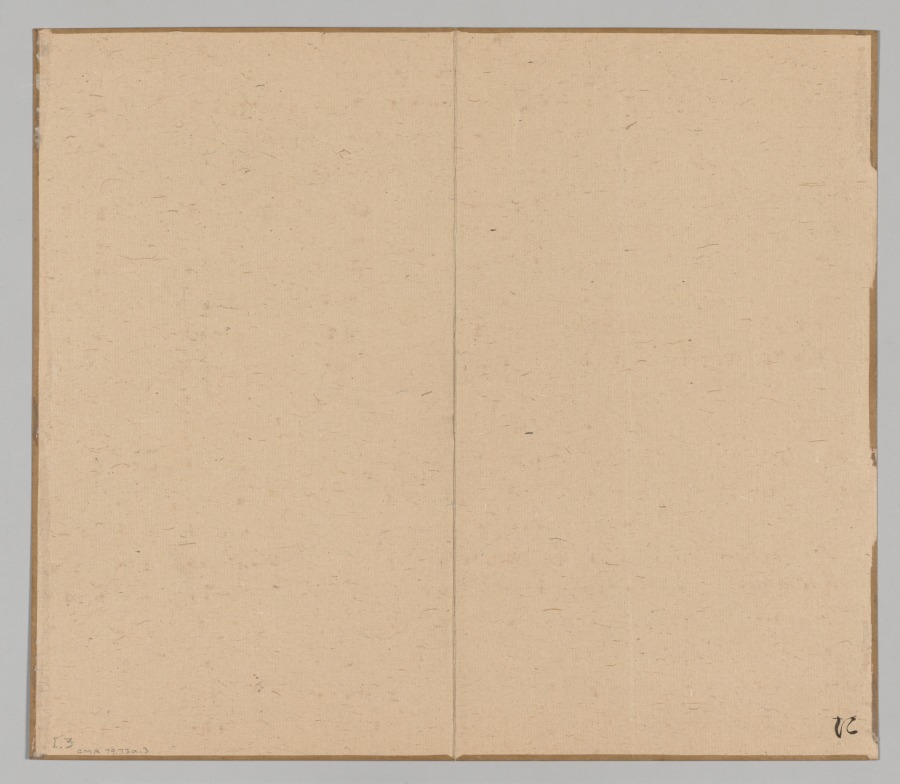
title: Reverberations of Taiga, Volume 1 (leaf 3)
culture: Japan, Edo period (1615–1868)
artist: Aoki Shukuya (Japanese, d. 1802)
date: mid- to late 1700s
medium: double-leaf from a pair of albums; ink and light color on paper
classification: Portfolio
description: Traditionally, young painters in Japan began their studies with an established master-painter. The master's compositions invariably became models that the apprentice copied to learn various ink and brush techniques. Shukuya was a pupil of the famous Kyoto artist Ikeno Taiga, whose style is reflected in these sketches of rocks, trees, and mountains.